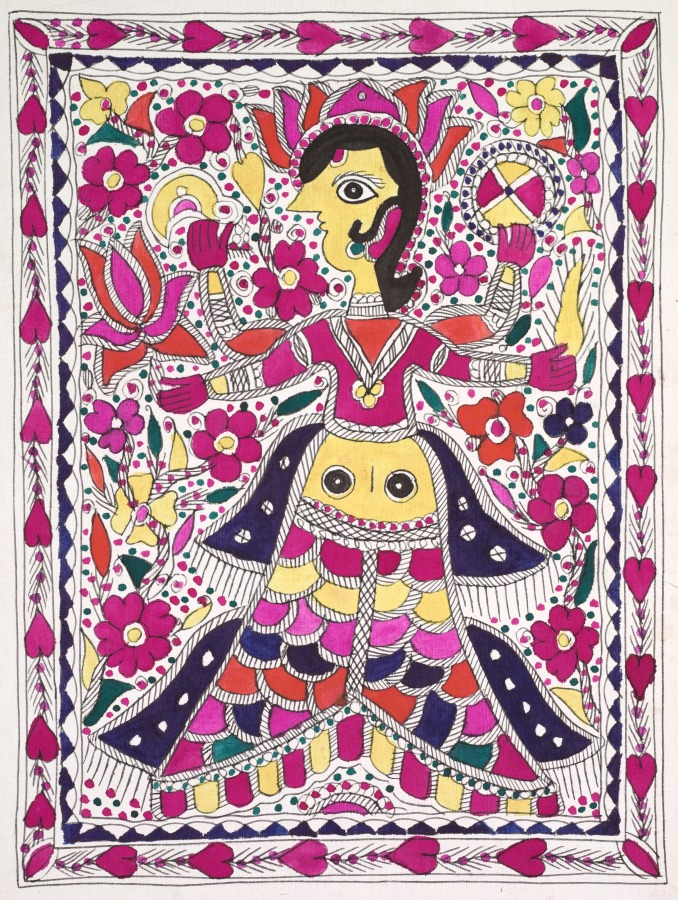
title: Four-armed goddess, with hearts in margin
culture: Eastern India, Bihar, Mithila region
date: 1900s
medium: ink and color on paper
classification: Painting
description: This goddess holds a lotus flower and a discus, along with two other unidentified objects. Historically, Madhubani paintings were murals created with brushes made of bamboo and cotton. They ornamented domestic spaces on the occasion of a festival or rite of passage in a woman's life, such as a birth or a wedding. In the wake of a drought in 1966, the All India Handicrafts Board encouraged women of the Mithila region make paintings on paper, so they could sell them and help support their communities.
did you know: Village women of rural northeastern India create the distinctive paintings known as "Madhubani."